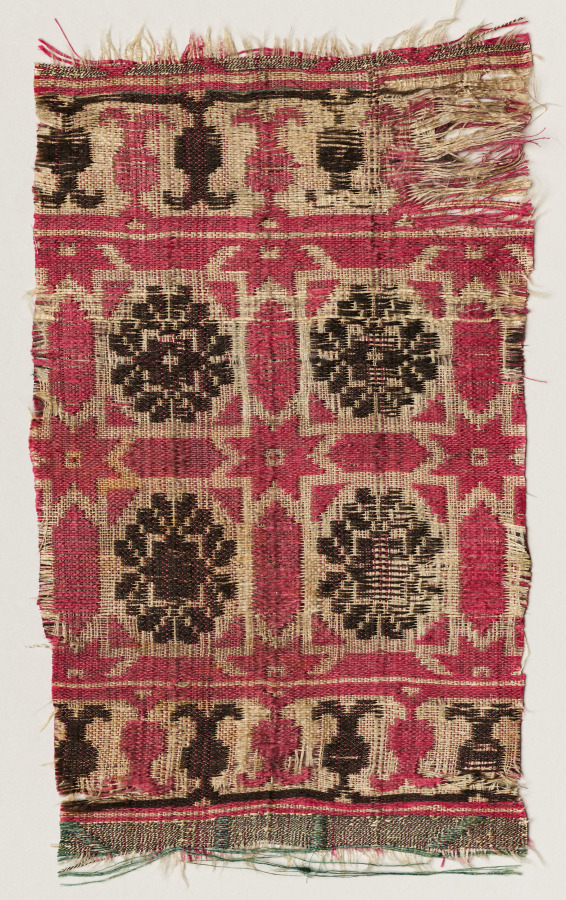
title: Fragment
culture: Africa, North Africa, Morocco, Moroccan weaver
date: 1800s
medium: Silk, metal, dye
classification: Textile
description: This woven fragment features a pattern of eight-pointed stars in various configurations, bordered by alternating black and red vegetal forms. Its fragmentary nature makes it difficult to assess what its original size, or function may have been.